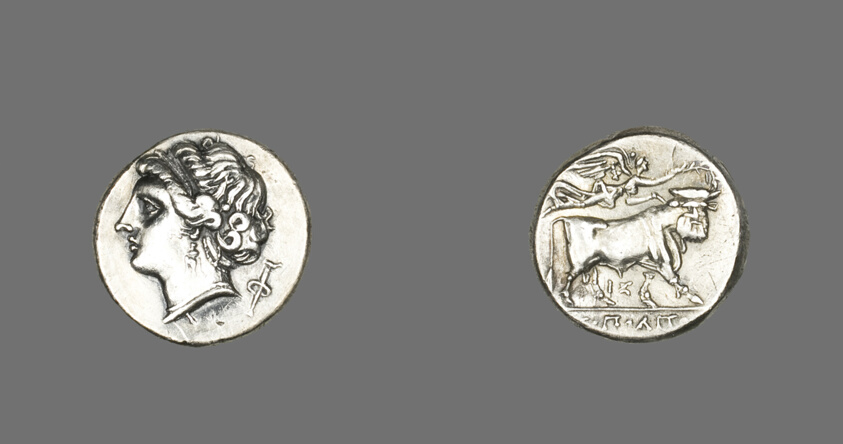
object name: Coin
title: Stater (Coin) Depicting the Siren Parthenope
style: hellenistic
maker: Greek, minted in Neapolis (now Naples), Italy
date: 280-241 BCE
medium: Silver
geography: Kavála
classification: coin; ancient art